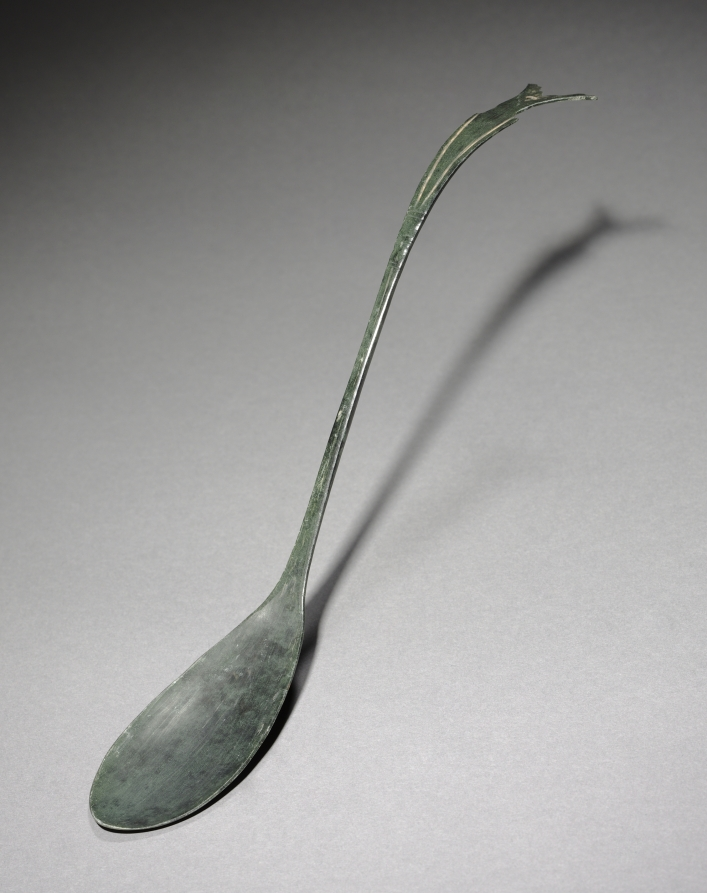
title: Spoon with Fish-Tail Design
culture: Korea, Goryeo dynasty (918–1392)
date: 918–1392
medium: bronze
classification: Metalwork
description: Many of Goryeo period spoons like this one feature a curved handle that splits into a jagged fishtail design. This fishtail design is not unique to Korea; it was also widely used in the area under the rule of two non-Han Chinese states: Liao (907–1125) and Jin (1115–1234). These seemingly ordinary objects testify to exciting material interactions between the Goryeo dynasty and non-Han Chinese northern states, which were often omitted from the official records.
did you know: Bronze spoons are the most common burial item. Scholars have proposed that toward the end of the 14th century, Koreans enjoyed meat-based soups more than any other dishes, explaining why spoons became common household items as well as burial goods.